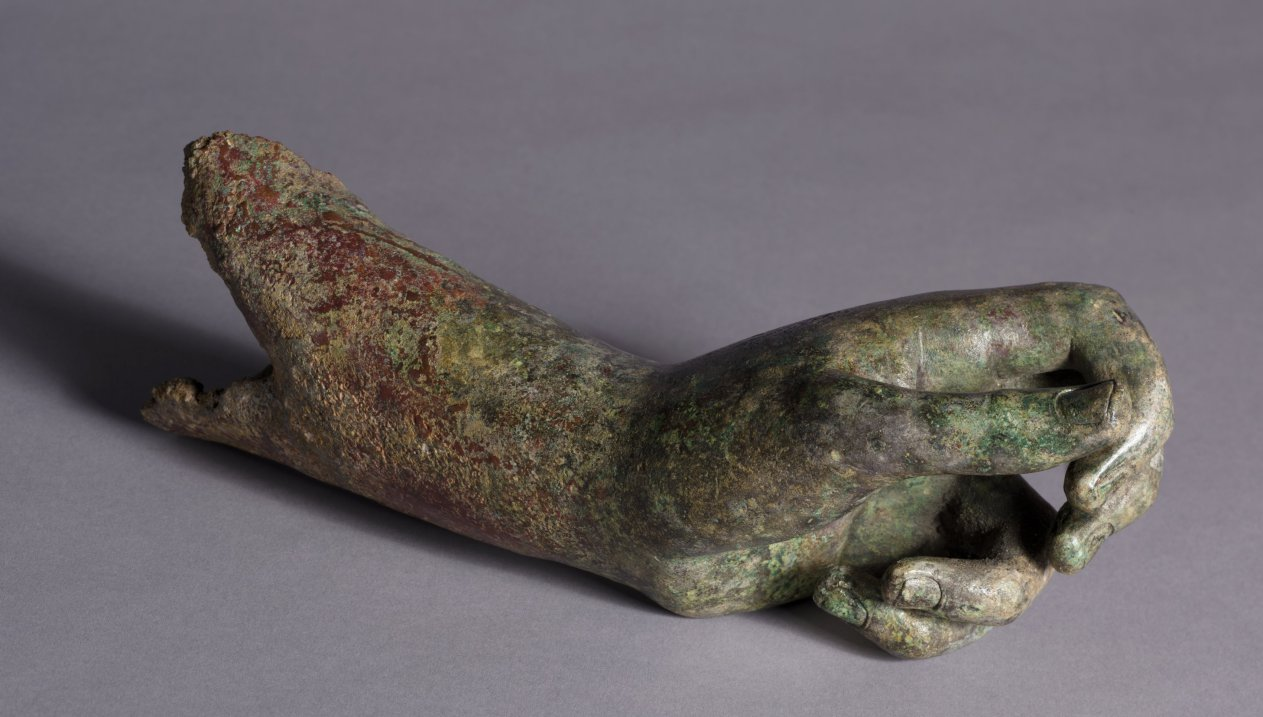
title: Detached Left Forearm and Hand of the Cleveland Apollo: Apollo Sauroktonos (Lizard-Slayer) or Apollo the Python-Slayer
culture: Greece, Athens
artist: attributed to Praxiteles (Greek, Athenian, c. 400–330 BCE)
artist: or Follower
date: c. 350–200 BCE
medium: bronze, copper and stone inlay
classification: Sculpture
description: Broken from the rest of the left arm some distance above the wrist, this fragment preserves much of the left forearm and the entire hand. The fingernails and folds of the palm are finely modeled, giving the hand a lifelike appearance. The positioning of the fingers and thumb suggests that the hand once gently grasped something, perhaps a slender branch of the now-lost tree.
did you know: The thumb and fingers are solid bronze, while the rest of this section is hollow.